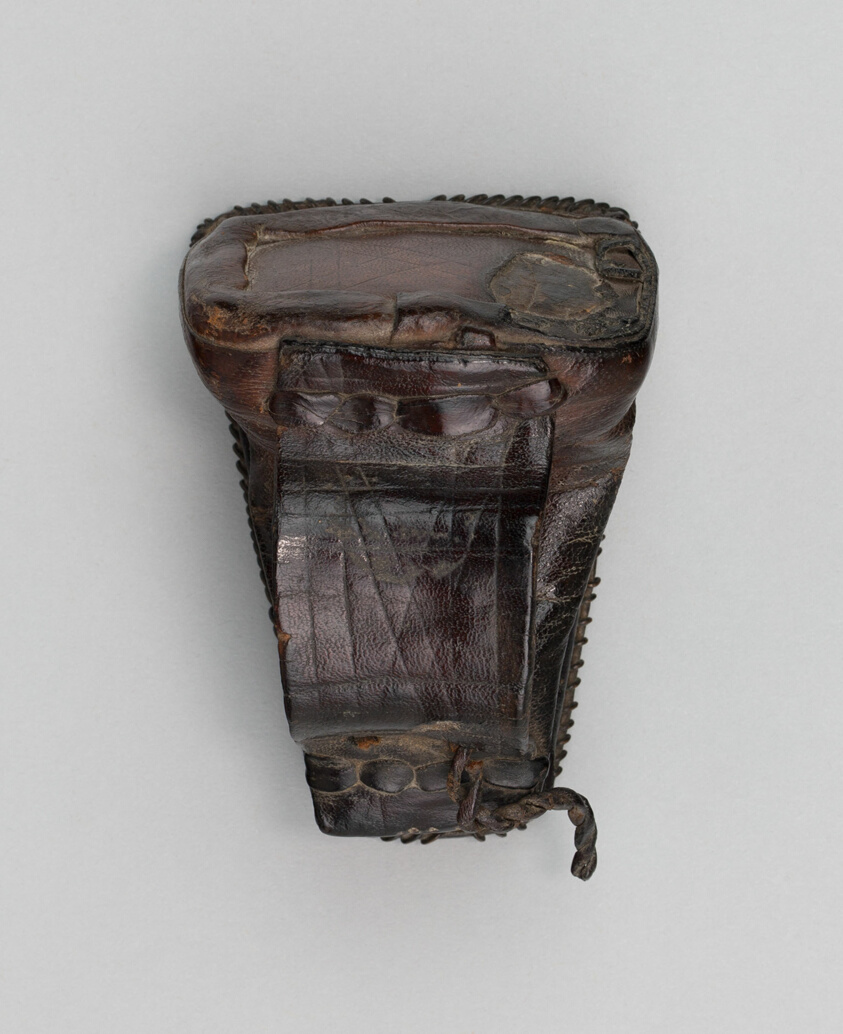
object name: Arms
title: Bullet Pouch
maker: German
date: 18th century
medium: Leather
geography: Germany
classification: firearm-accessory; arms; arms and armor